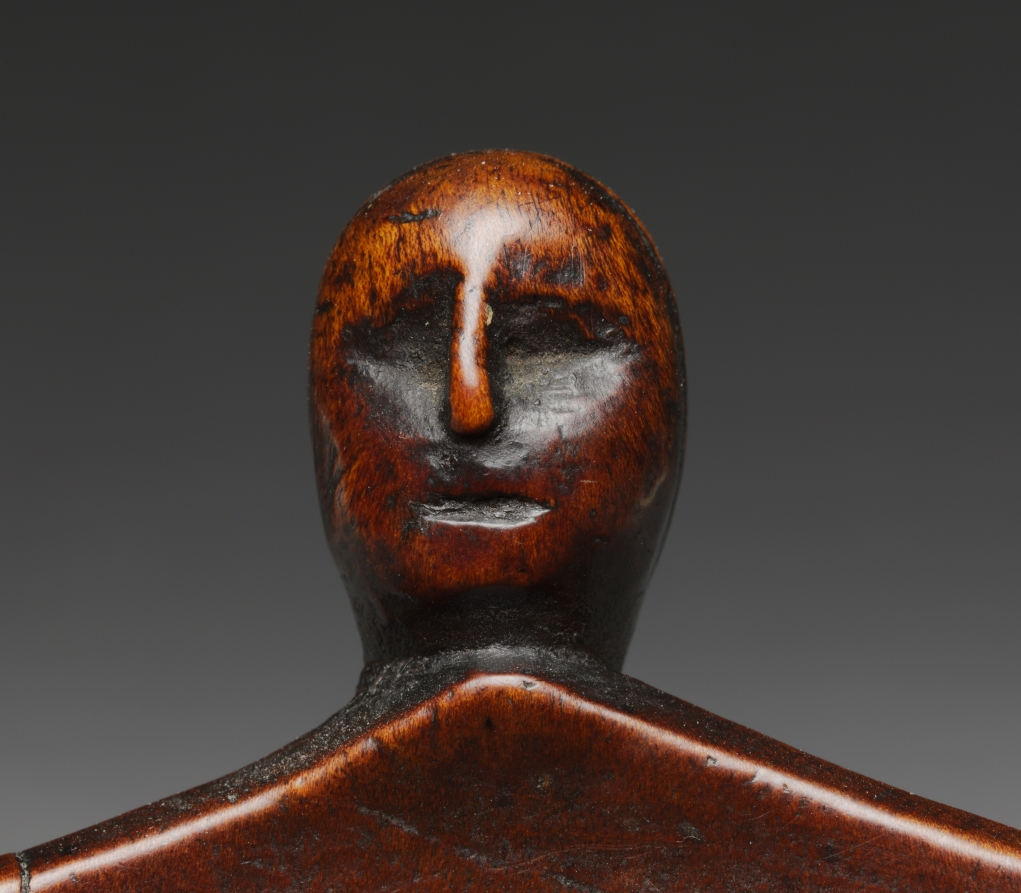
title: Bowl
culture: Native North America, Northeastern Woodlands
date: early 1800s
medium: wood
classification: Wood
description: Fine wooden bowls were often used during feasts in the Northeastern Woodlands. The heads on the rims may represent spirit beings, perhaps the owner’s guardian spirits, acquired through dreams or visions—thought to be the ultimate sources of truth. The medium may also be profoundly meaningful. A Great Lakes (Meskwaki) Native said in 1911, “The murmur of the trees when the wind passes through is but the voices of our grandparents. Often a whole forest hums with talk . . . we often hear the sound of their laughter and the sound of their lamentations.”